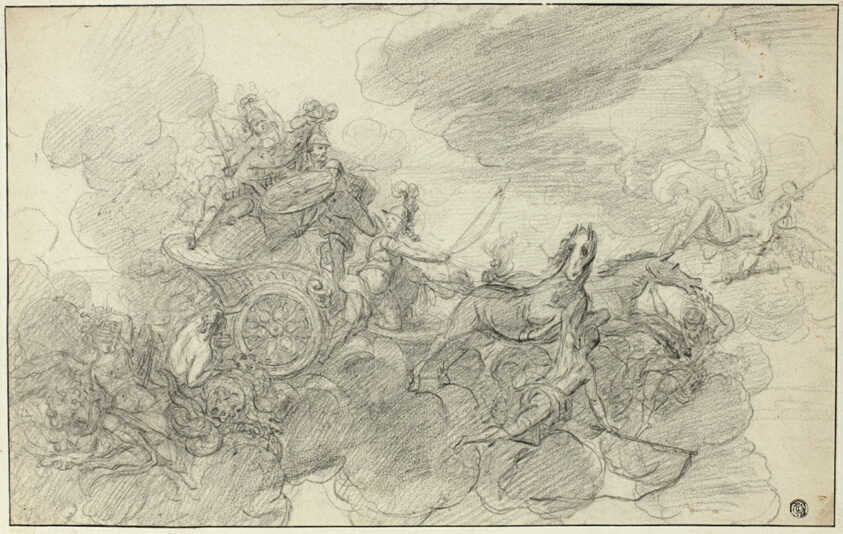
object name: Drawing and Watercolor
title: Chariot of Mars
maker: Follower of Jean Baptiste Jouvenet, III (French, 1644-1717)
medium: Black chalk on ivory laid paper, laid down on ivory laid paper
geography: France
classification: charcoal; drawings (visual works); prints and drawing